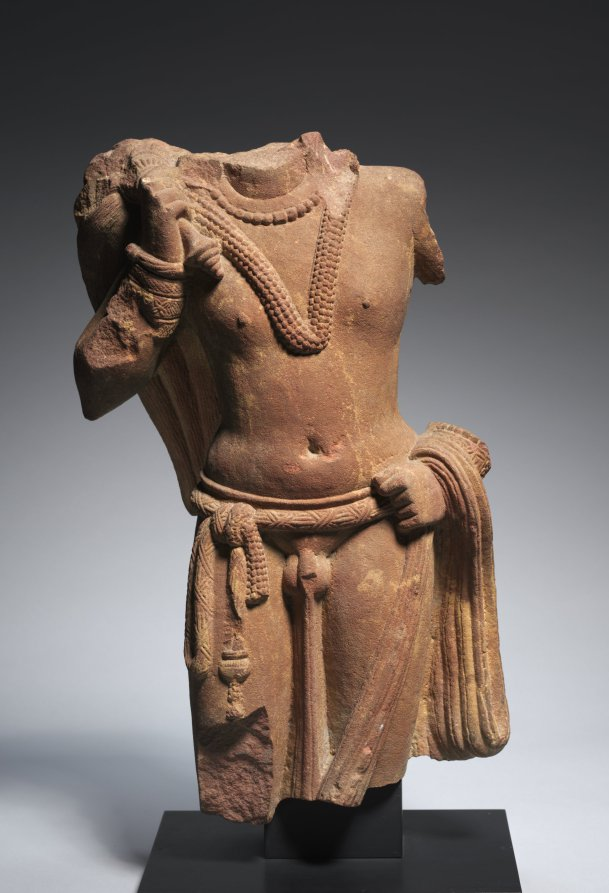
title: Attendant Bearing a Fly Whisk (Chauri)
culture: Northern India, Uttar Pradesh, Mathura, Kushan period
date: c. 100–150 CE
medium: red sandstone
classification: Sculpture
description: This figure would have been one of two flanking a king, the Buddha, or other royal or holy figure. The relaxed stance indicates that he is an attendant, rather than a central icon. Early depictions of the Buddha in India frequently have images of chauri-bearers on either side. They are identifiable as nature divinities called yakshas during this period, but in later periods the Buddha's attendants can be recognized as specific bodhisattvas, who are beings on the path to enlightenment.